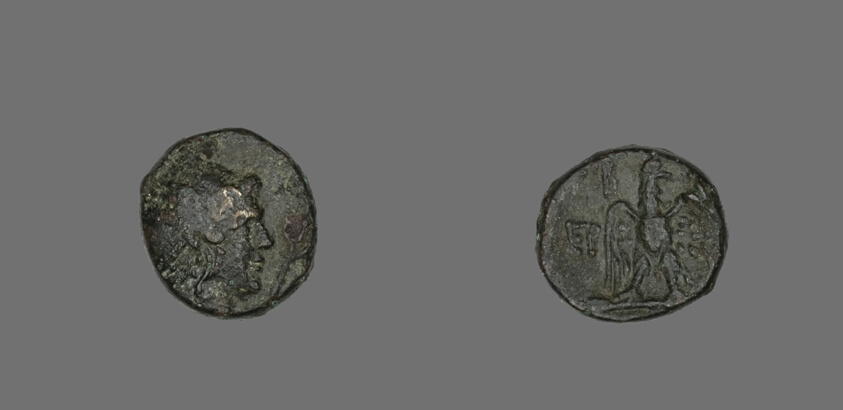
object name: Coin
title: Coin Depicting the Hero Perseus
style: greek, ancient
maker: Greek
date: 178-168 BCE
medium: Bronze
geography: Greece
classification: coin; ancient art; struck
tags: mythological figures